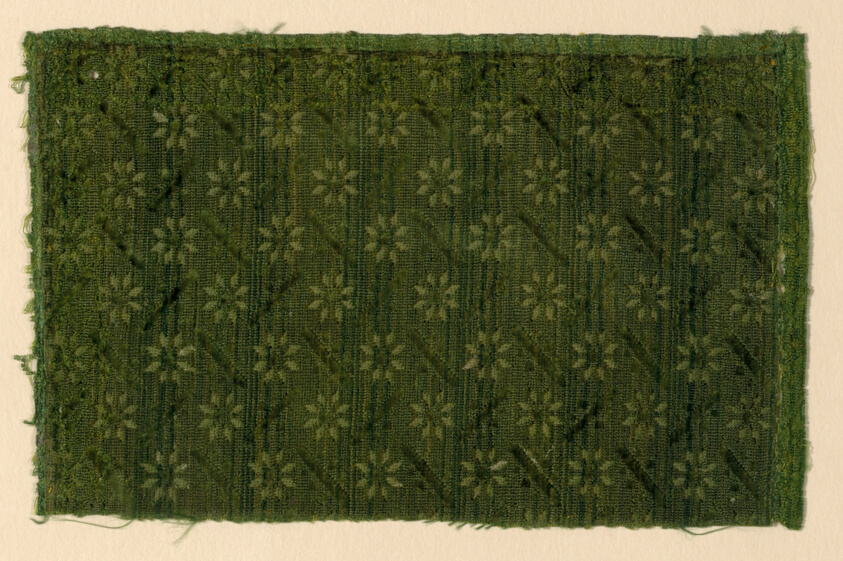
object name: Textile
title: Fragment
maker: Italy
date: 1575/1625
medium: Silk; velvet: cut, uncut, and voided; against plain weave foundation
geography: Italy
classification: textile; weaving; weaving - velvet